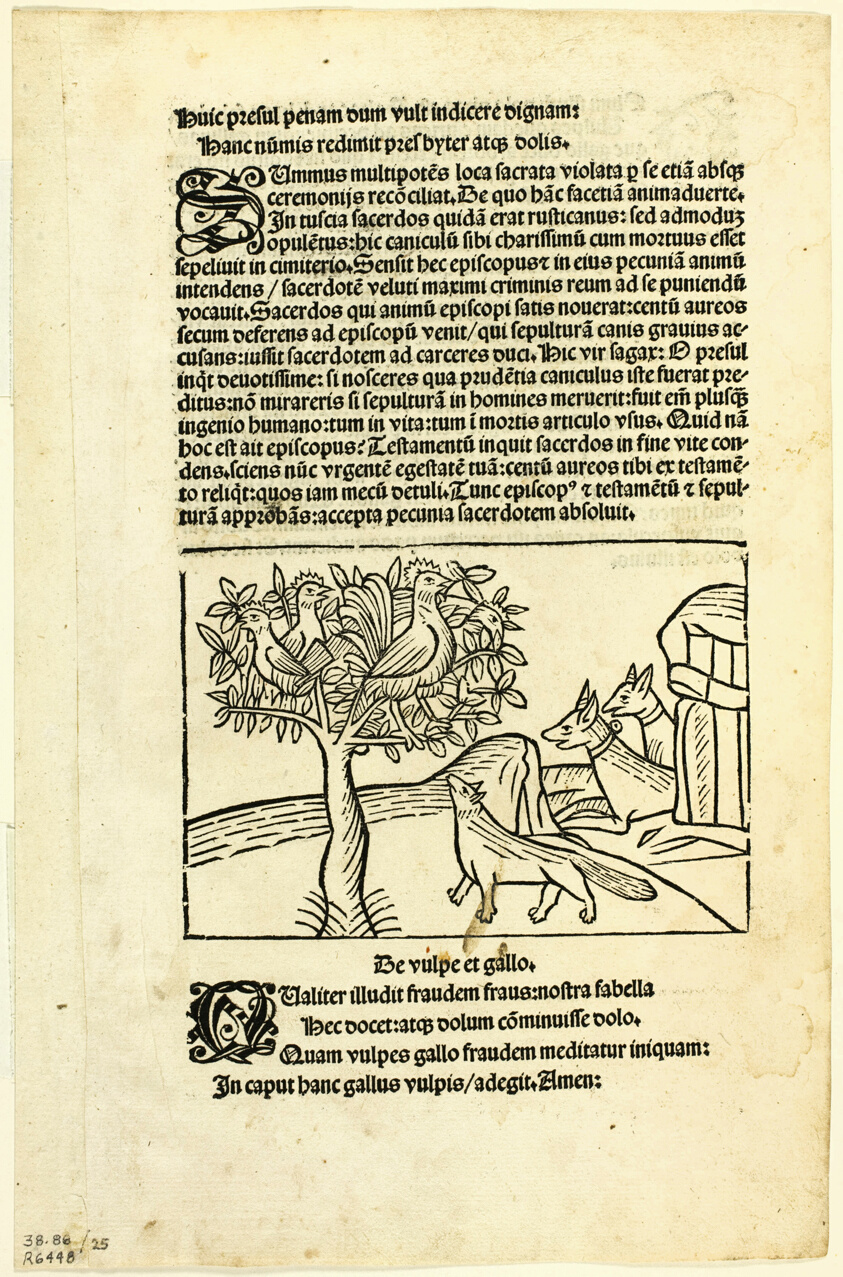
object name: Print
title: The Fox and the Rooster from Fabulae et Vita (Fables and Life), Plate 25 from Woodcuts from Books of the 15th Century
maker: Unknown Artist (Basle, late 15th century); printed and published by Michael Furter (German, active 1483–1516/17); original text by Aesop (Greek, c. 620–560 B.C.); portfolio text by Wilhelm Ludwig Schreiber (German, 1855–1932)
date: c. 1500, portfolio assembled 1929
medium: Woodcut in black, and letterpress in black (recto and verso), on buff laid paper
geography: Germany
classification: woodcut; print; prints and drawing